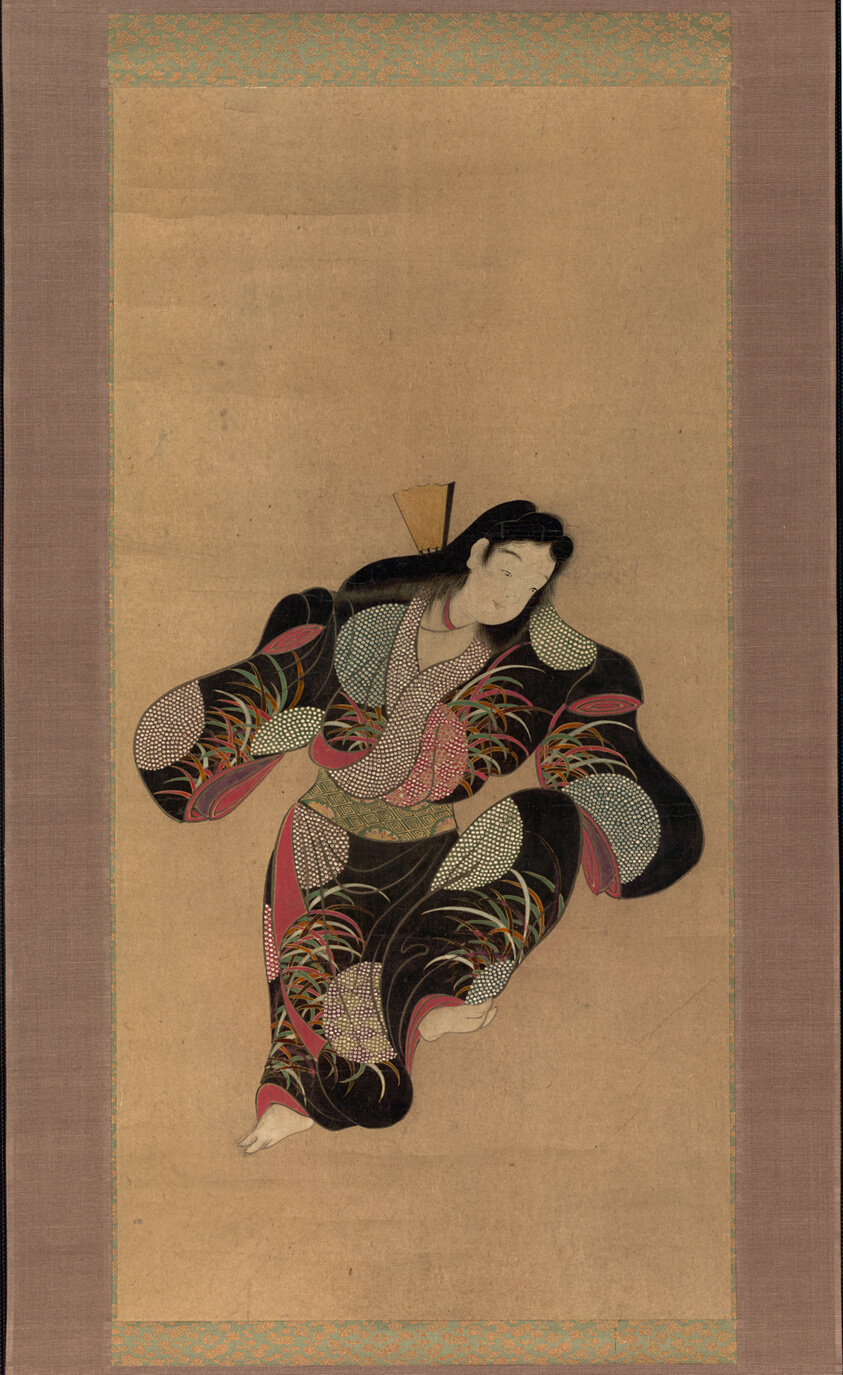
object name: Painting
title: Female Dancer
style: Japanese (culture or style)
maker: Artist unknown; Japanese, active 17th century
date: 1624–44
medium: Hanging scroll; ink, color, and gold on paper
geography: Japan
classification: hanging scroll; painting; asian art